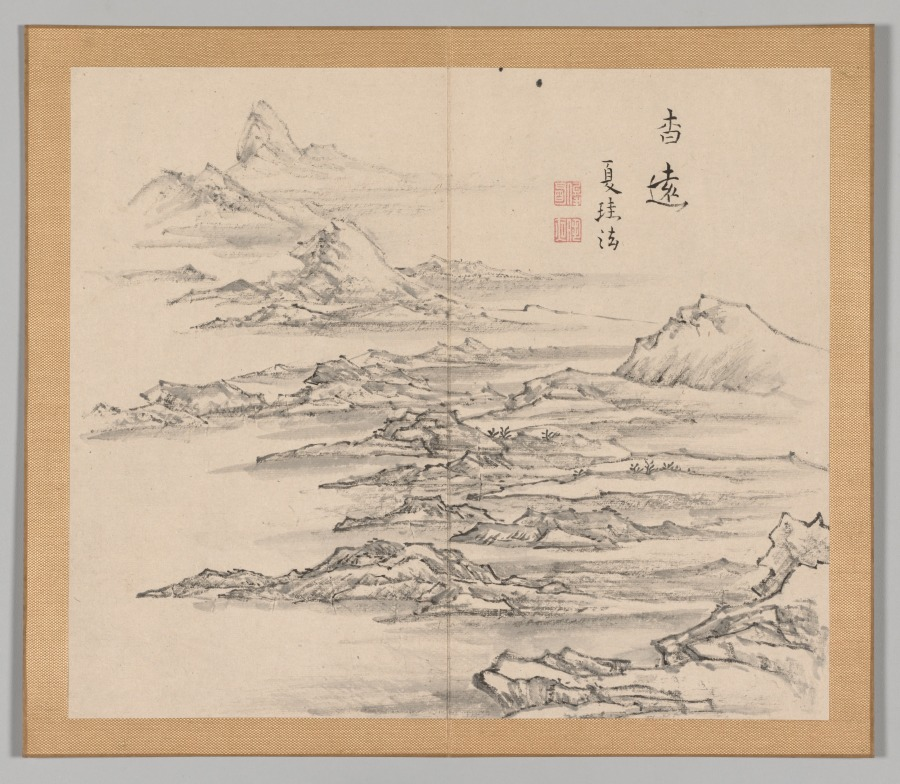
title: Reverberations of Taiga, Volume 2 (leaf 5)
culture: Japan, Edo period (1615–1868)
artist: Aoki Shukuya (Japanese, d. 1802)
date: mid- to late 1700s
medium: double-leaf from a pair of albums; ink and light color on paper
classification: Portfolio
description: Traditionally, young painters in Japan began their studies with an established master-painter. The master's compositions invariably became models that the apprentice copied to learn various ink and brush techniques. Shukuya was a pupil of the famous Kyoto artist Ikeno Taiga, whose style is reflected in these sketches of rocks, trees, and mountains.